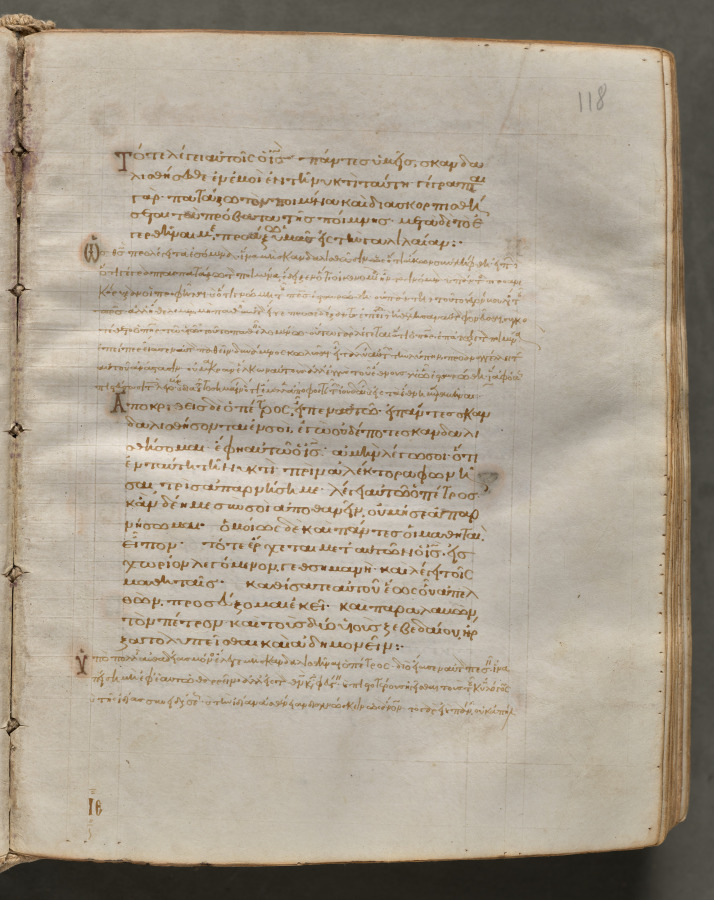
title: Text, folio 118 (recto), from a Gospel Book with Commentaries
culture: Byzantium, Constantinople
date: c. 1000–1100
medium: ink, tempera, and gold on vellum; leather binding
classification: Bound Volume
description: Each of the four gospels in this book opens on a page with brilliantly illuminated borders depicting the author of the text as well as birds-principally peacocks, symbols of the immortality of the soul-and fountains, representing the fountain of life and the salvation of the soul. This volume consists of 428 leaves with texts in Greek. Its level of sophistication suggests that it was probably written and decorated in a monastery in Constantinople.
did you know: Gospel Books were carried in procession through Byzantine churches.